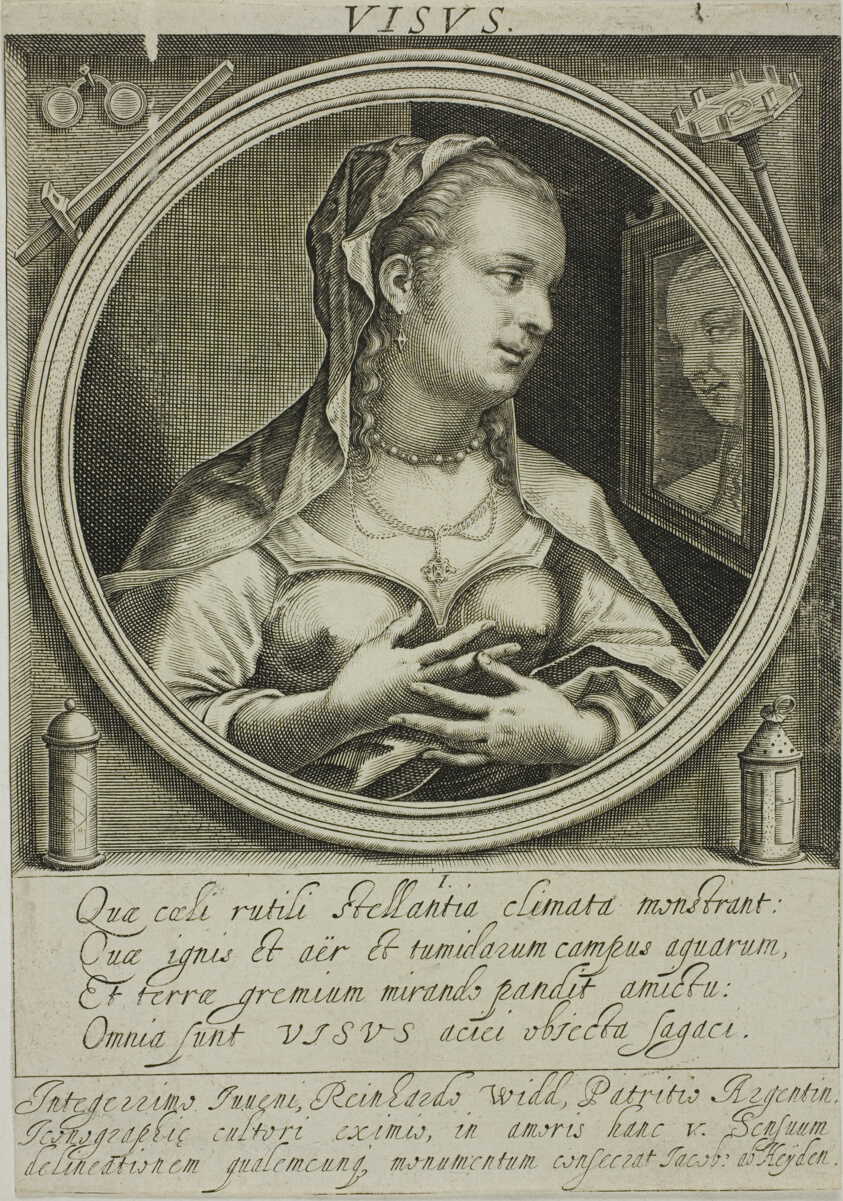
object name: Print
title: Sight, plate one from The Five Senses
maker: Jacob van der Heyden (Flemish, 1573-1645)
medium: Etching and engraving in black on ivory laid paper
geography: Flanders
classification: etching; print; prints and drawing